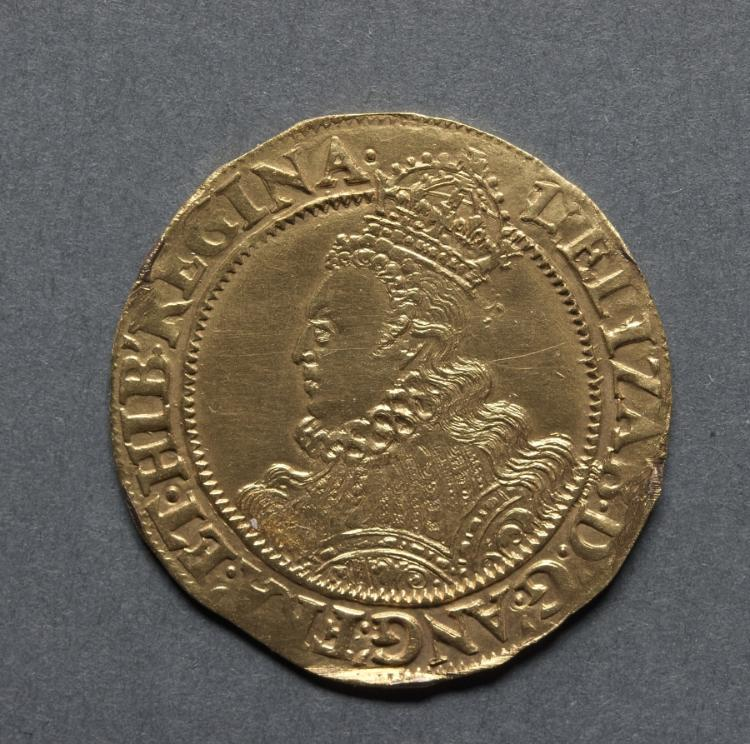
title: Half Pound: Elizabeth I (obverse)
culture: England, Elizabeth I, 1558-1603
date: 1601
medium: gold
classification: Coins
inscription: ELIZAB' D'.G'. ANG'. FRA'. ET: HIB. REGINA.